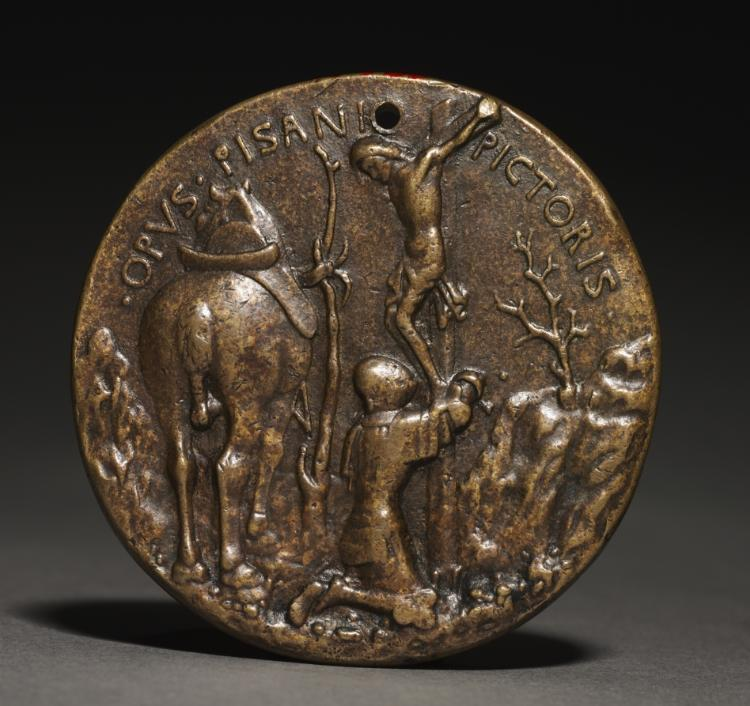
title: Portrait Medal of Domenico Novello Malatesta (reverse)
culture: Italy, 15th century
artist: Pisanello (Italian, Ferrara, c. 1395–1455)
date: c. 1445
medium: bronze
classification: Sculpture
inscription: reverse: OPVS PISANI PICTORIS